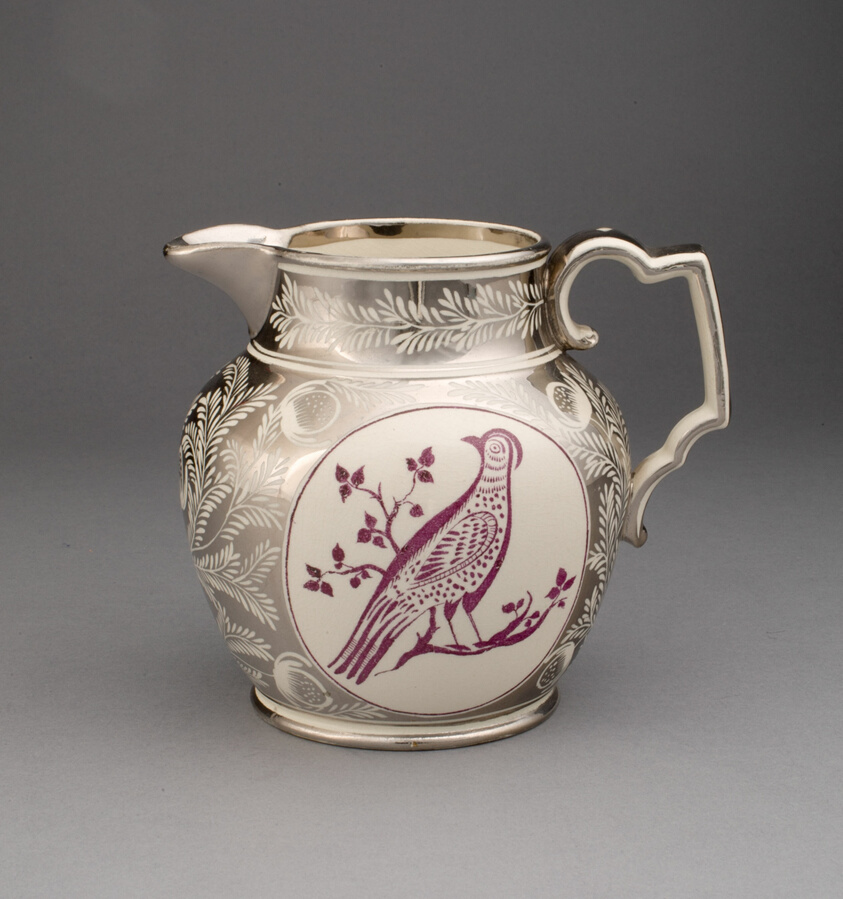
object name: Ceramics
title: Jug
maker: England, Staffordshire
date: 1810/20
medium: Lead-glazed earthenware with lustre decoration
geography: Staffordshire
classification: earthenware; european decorative arts; ceramics